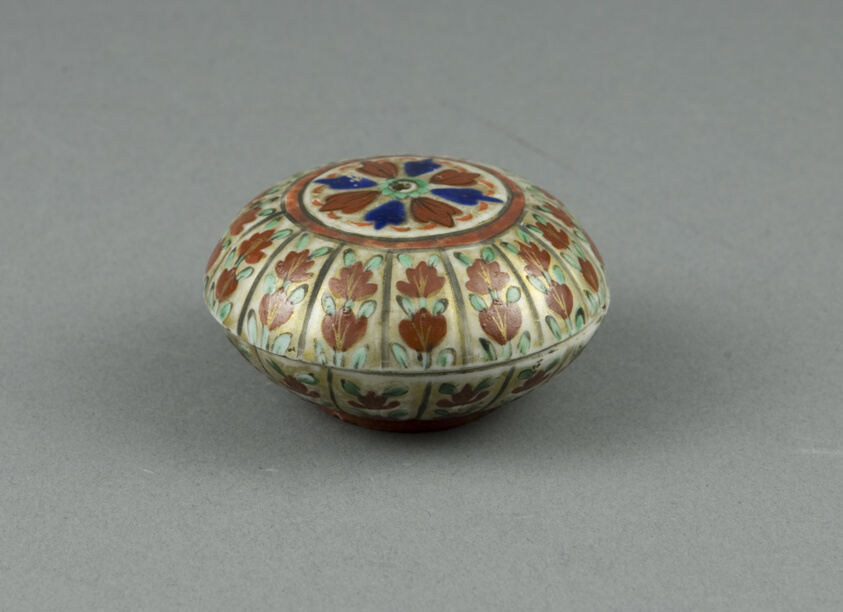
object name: Decorative Arts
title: Lai Nam Thong (Gold-Washed) Ware, Miniature Covered Box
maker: China, for the Thai Market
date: 19th century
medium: Porcelain painted with gilt in overglaze polychrome enamels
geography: China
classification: porcelain; asian art; ceramics; decorative arts